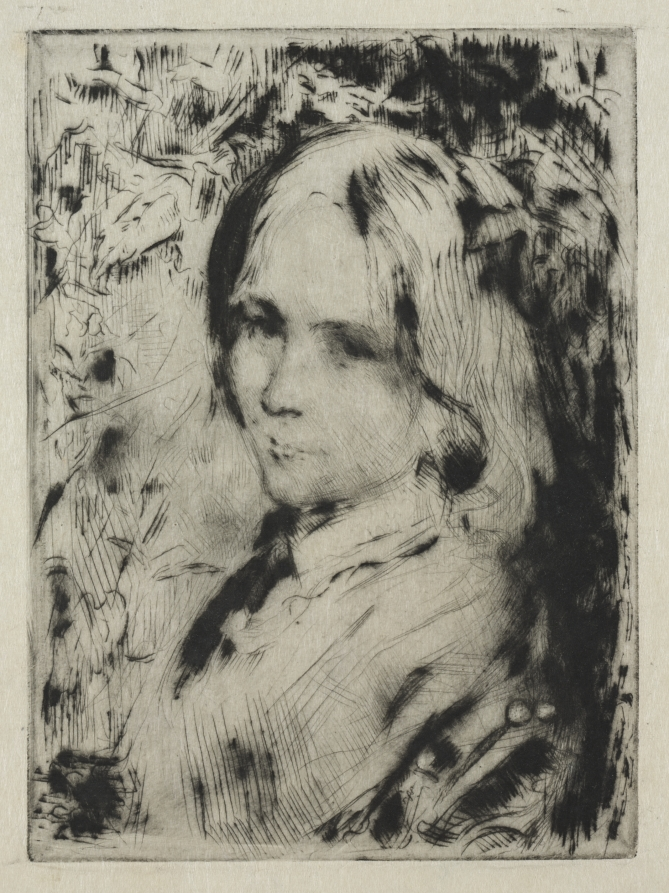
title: Quand tu seras fleur devenue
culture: France, 20th century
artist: Charles Albert Waltner (French, 1846–1925)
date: 1905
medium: drypoint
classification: Print